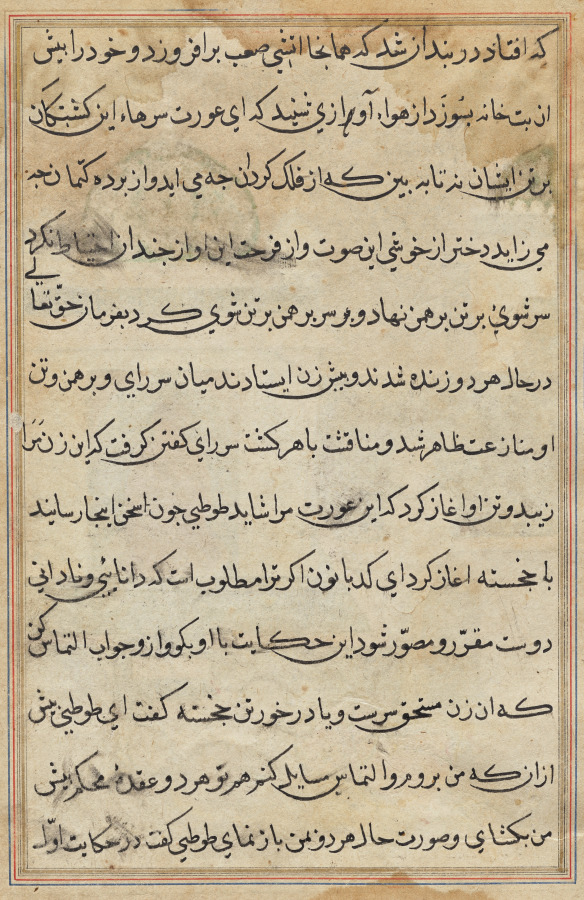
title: Page from Tales of a Parrot (Tuti-nama): text page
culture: Mughal India, court of Akbar (reigned 1556–1605)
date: c. 1560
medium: gum tempera, ink, and gold on paper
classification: Painting